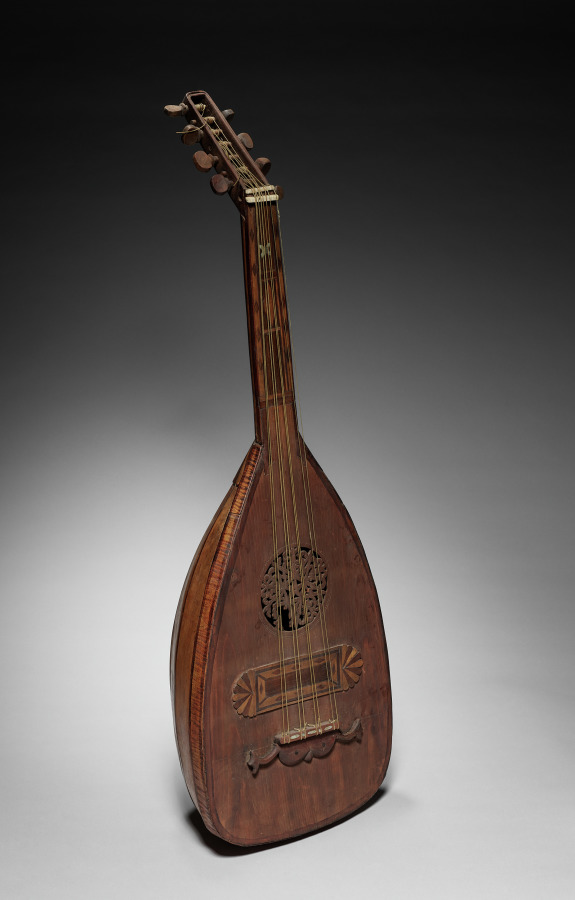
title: Lute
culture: Italy, Venice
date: 1300s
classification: Musical Instrument